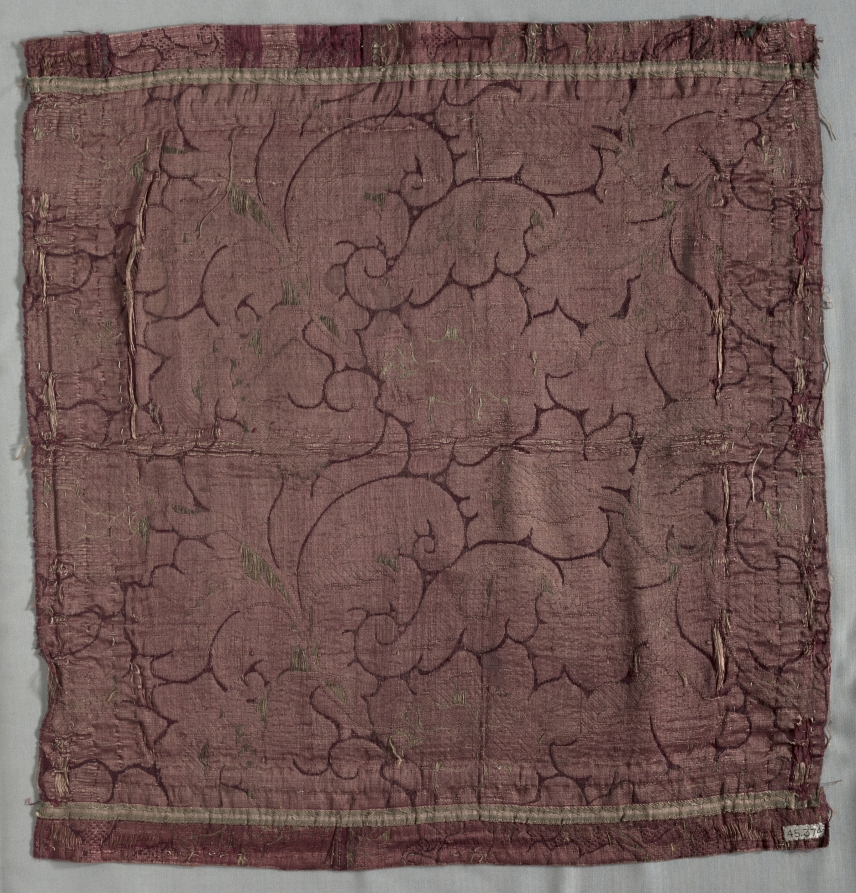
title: Ciborium Veil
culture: Italy, 17th century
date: 1600s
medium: plain compound satin; silk and gold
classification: Textile